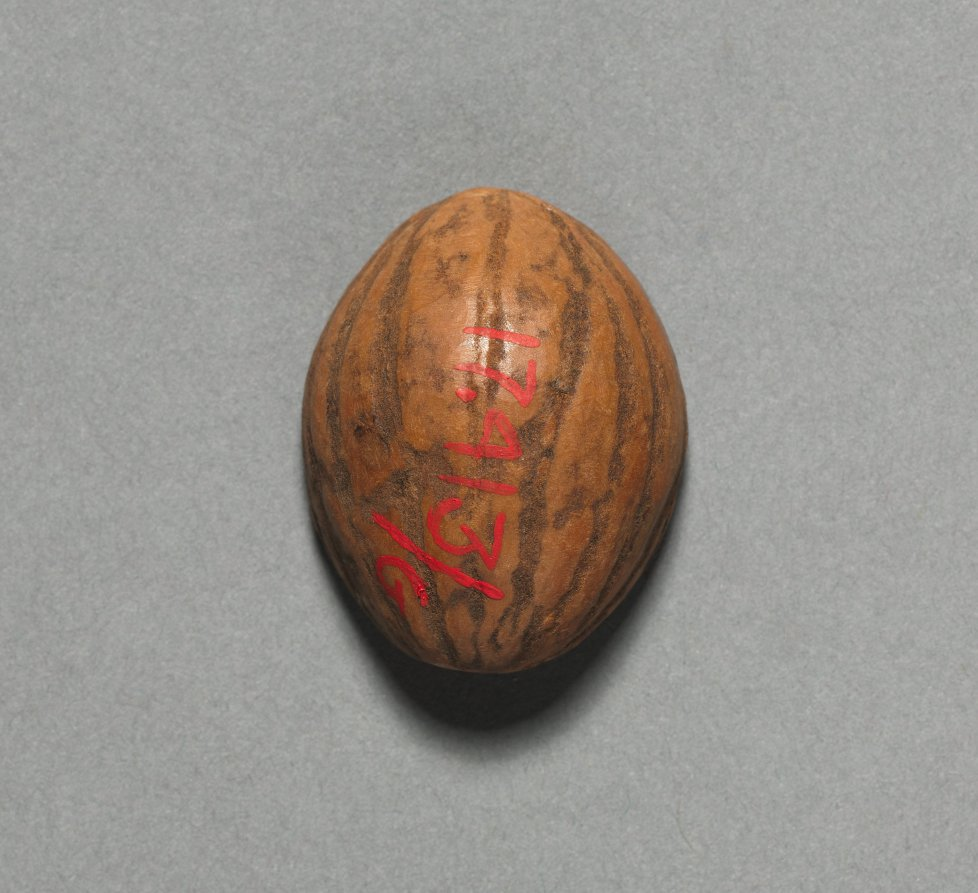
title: Gambling Dice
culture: California, Tulare, Unassigned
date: before 1917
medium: hollow shell, resin, glass beads, mica/seashell fragment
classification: Implements